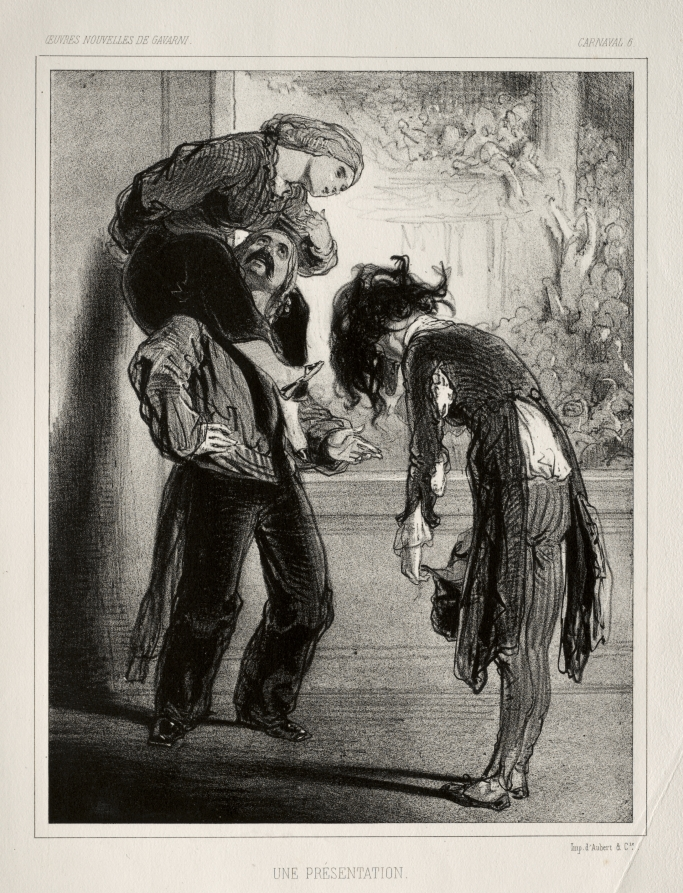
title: Carnaval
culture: France, 19th century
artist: Paul Gavarni (French, 1804–1866)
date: c. 1841–47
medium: lithograph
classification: Print